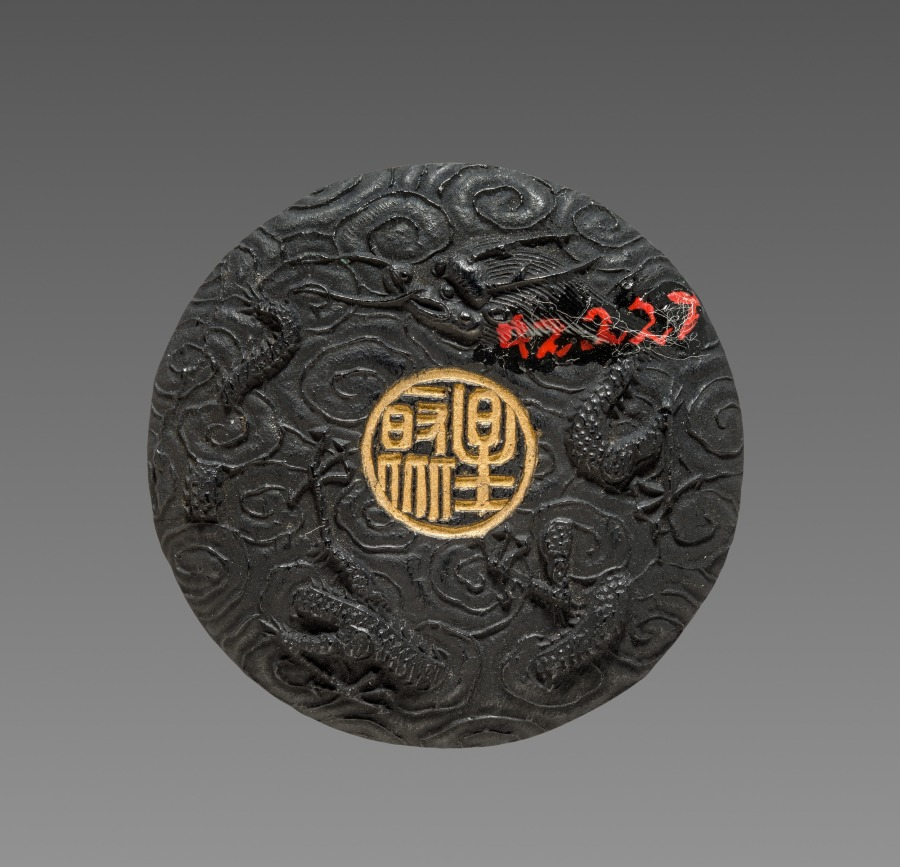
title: Ink Cake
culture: China, Qing dynasty (1644-1911)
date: 19th Century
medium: ink cake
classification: Miscellaneous